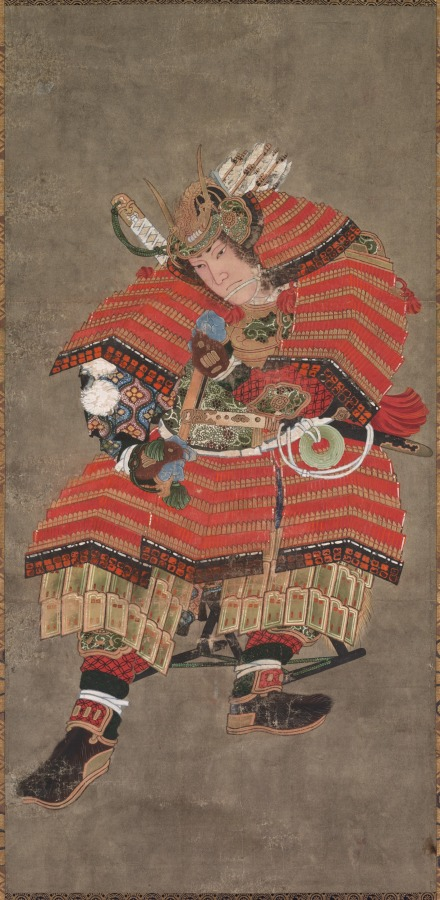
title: Minamoto no Yoshitsune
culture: Japan, Edo period (1615–1868)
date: 1800–1868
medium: hanging scroll; ink and color on paper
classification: Painting